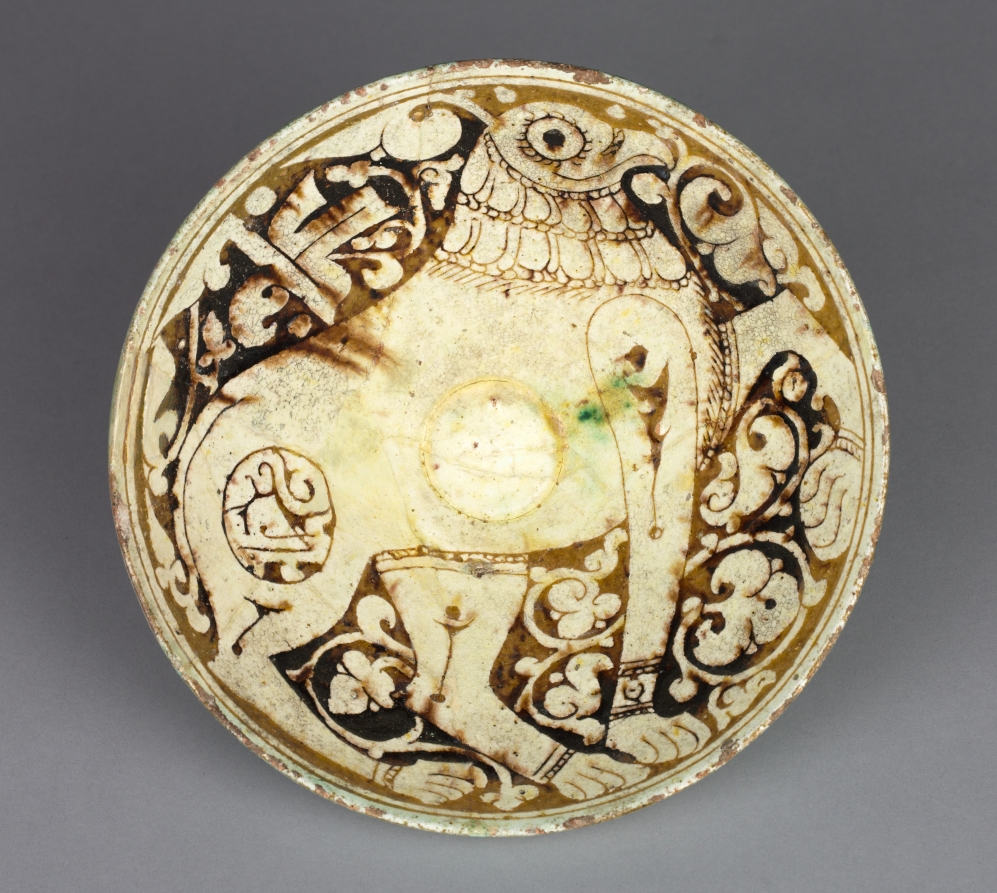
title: Bowl with Griffin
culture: Northwest Iran, Garrus district, Seljuk period, 12th century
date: 1100s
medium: earthenware with underglaze slip-painted decoration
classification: Ceramic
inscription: Arabic letters in floriated Kufic on griffon's hip (ta or sad?) and above his back (kaf?).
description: Animated animals, such as this griffin, and robust palmette scrolls characterize the bold designs that often appear on dark manganese backgrounds in Garrus ware, from northwestern Iran.